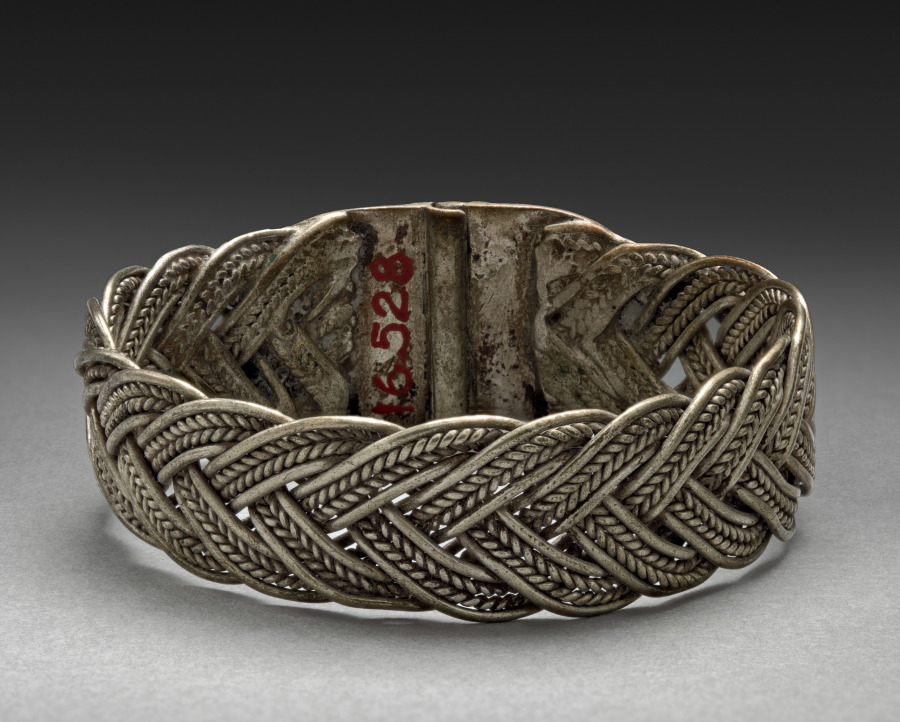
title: Bracelet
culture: Bulgaria, 18th-19th century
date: 1700s - 1800s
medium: silver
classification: Jewelry